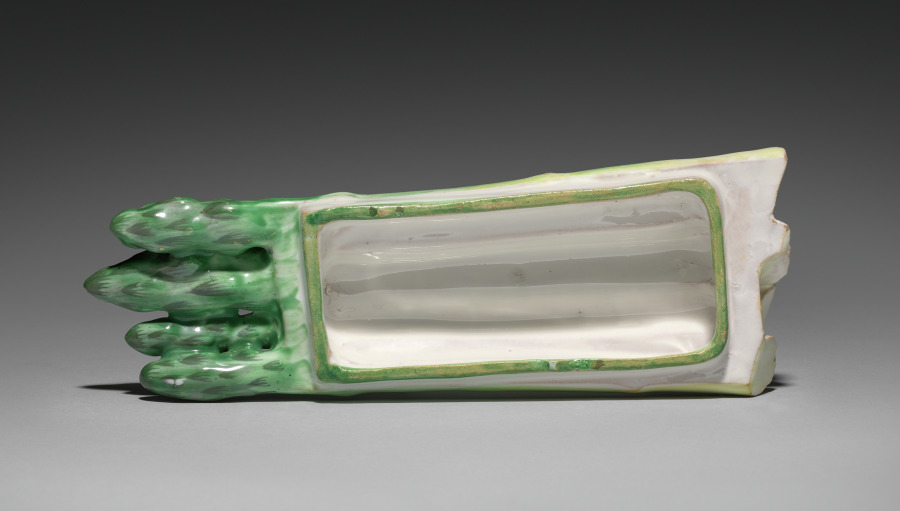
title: Box in the Form of Asparagus (lid)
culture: France, Sceaux(?), 18th century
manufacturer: possibly by Sceaux Factory (French, active 1748–66)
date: c. 1765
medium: tin-glazed earthenware (faience) with enamel decoration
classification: Ceramic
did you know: Placed upon the dinner table, this container's lid might be lifted to reveal steaming asparagus. Imagine a wealthy 18th-century dining room with flickering candles, whimsical sculptures, and dishes like this decorating the table.